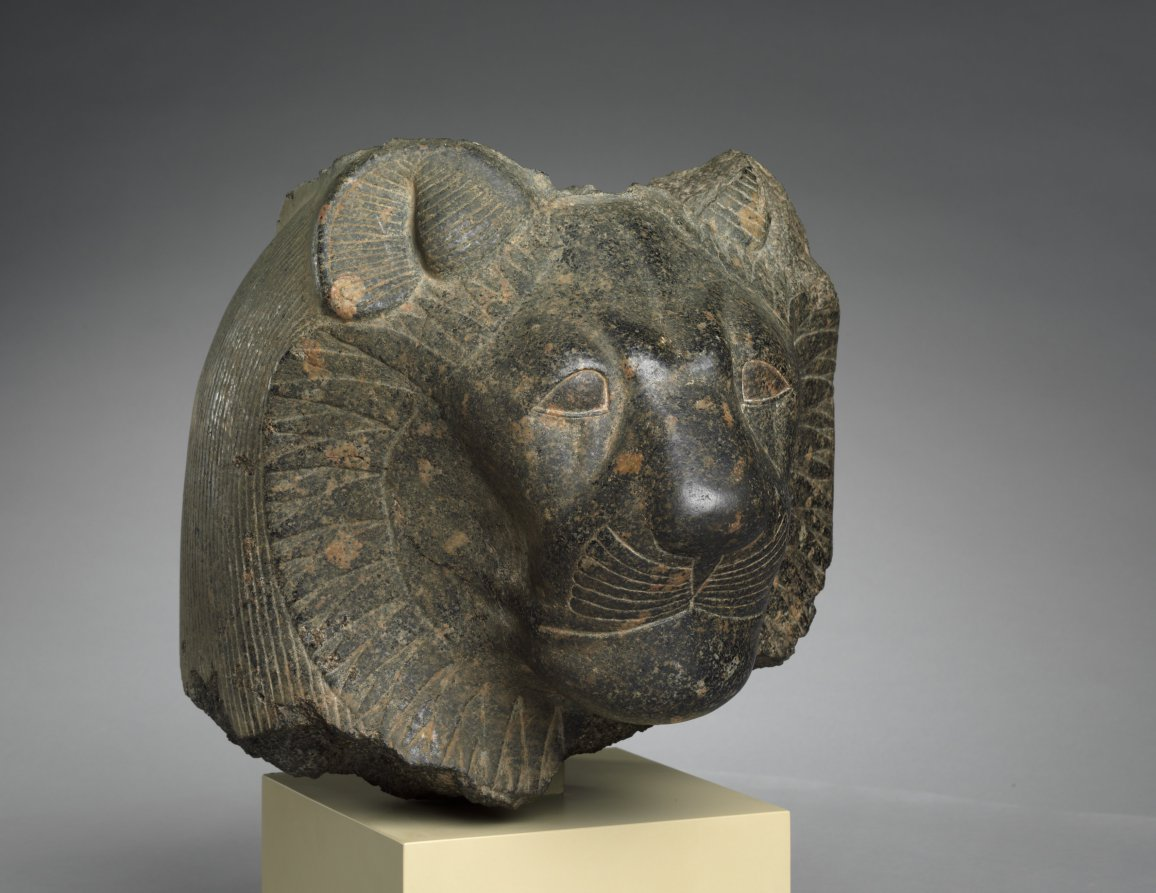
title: Head of Sekhmet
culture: Egypt, Thebes(?), New Kingdom (1540–1069 BCE), Dynasty 18, reign of Amenhotep III (1390–1352 BCE)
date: c. 1391–1353 BCE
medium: granodiorite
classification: Sculpture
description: This lioness head once belonged to a grand statue of the goddess Sekhmet, "the powerful one," probably seated and wearing a tight dress. Possibly appealing to her healing aspect, Pharaoh Amenhotep III, often described as “beloved of Sekhmet,” commissioned and dedicated hundreds of large granodiorite Sekhmet sculptures in his Theban mortuary temple. Thus, this head likely comes from Thebes, perhaps later moved across the Nile—like many such sculptures—to the temple of Mut, a related deity, at Karnak. Behind her stylized ruff, Sekhmet wears a wig, once crowned with a sun disk and uraeus, the stylized cobra symbolizing royal or divine power.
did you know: Amenhotep III may have dedicated 730 statues of Sekhmet, two for each day of the year.